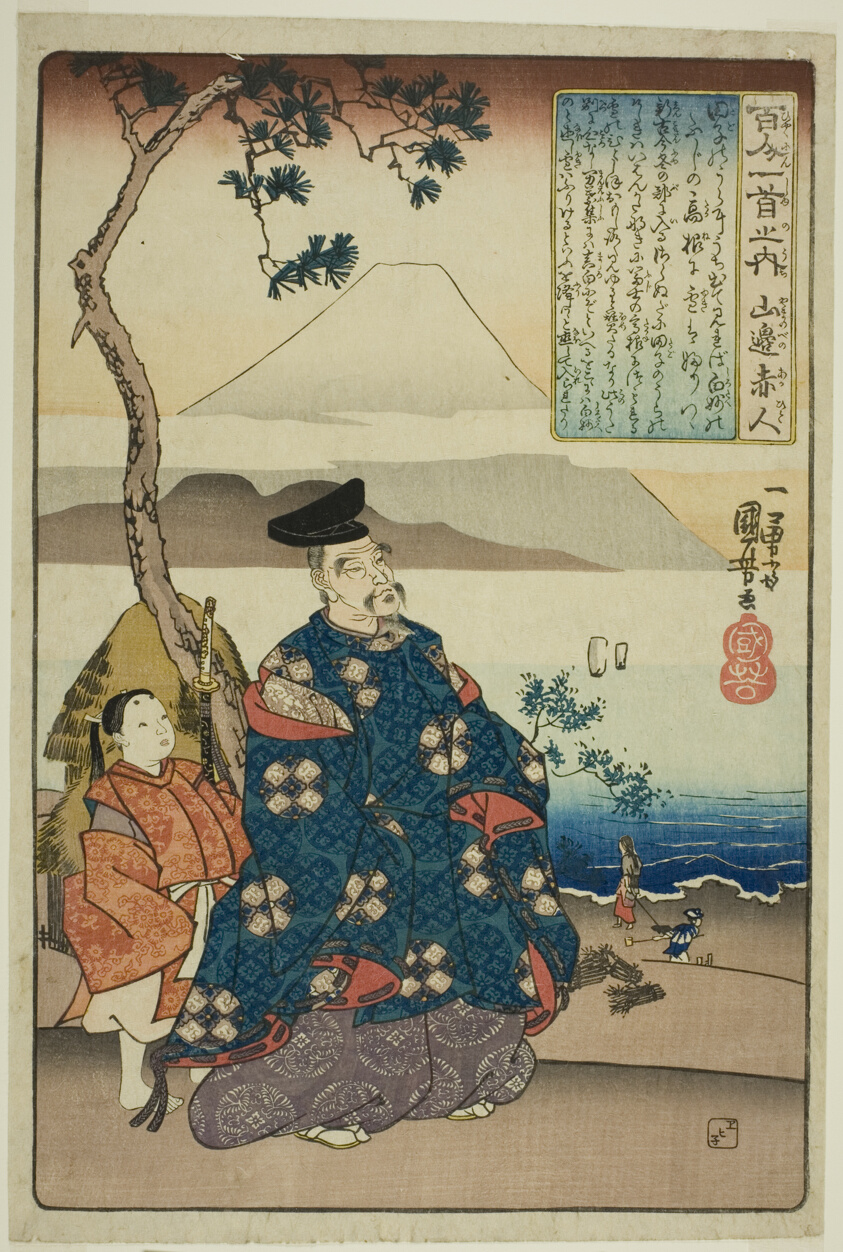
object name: Print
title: Yamanobe no Akahito, from the series "One Hundred Poems by One Hundred Poets (Hyakunin isshu no uchi)"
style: Japanese (culture or style)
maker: Utagawa Kuniyoshi (Japanese, 1797-1861)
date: c. 1842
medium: Color woodblock print; oban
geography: Japan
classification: woodblock print; print; asian art